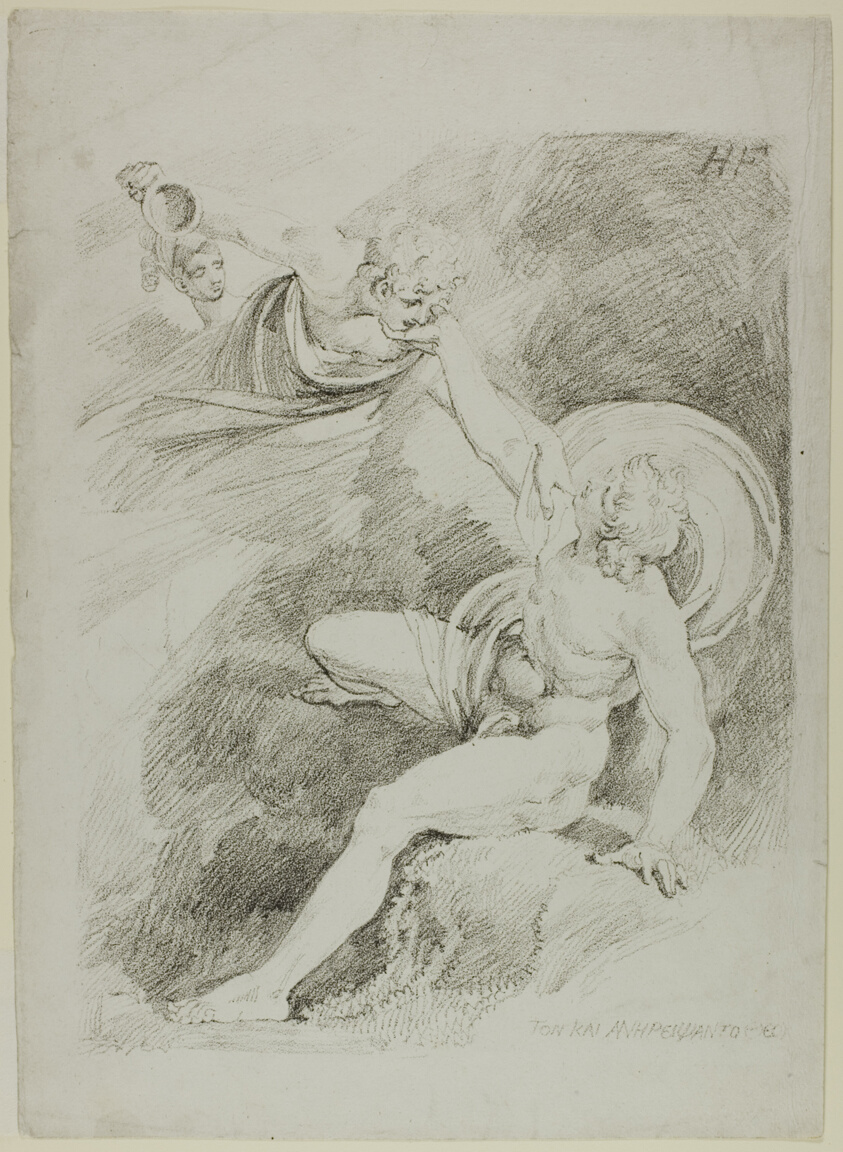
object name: Print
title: Heavenly Ganymede, from Specimens of Polyautography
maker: Henry Fuseli (Swiss, active in England, 1741-1825)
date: 1804 (published 1806-07)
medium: Lithograph in black on ivory wove paper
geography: England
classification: lithograph; print; prints and drawing